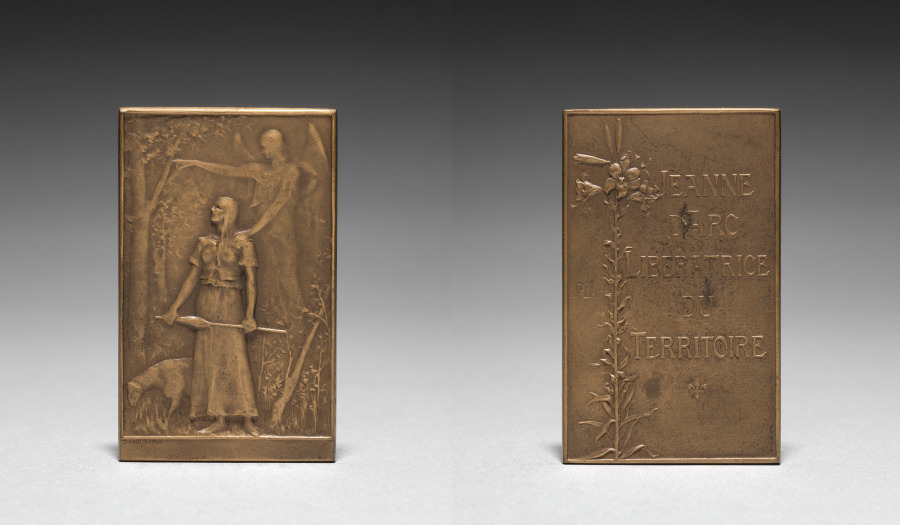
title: Medallion: Jeanne d'Arc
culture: France, 19th century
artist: Daniel Dupuis (French, 1819–1899)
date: c.1900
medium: bronze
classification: Metalwork